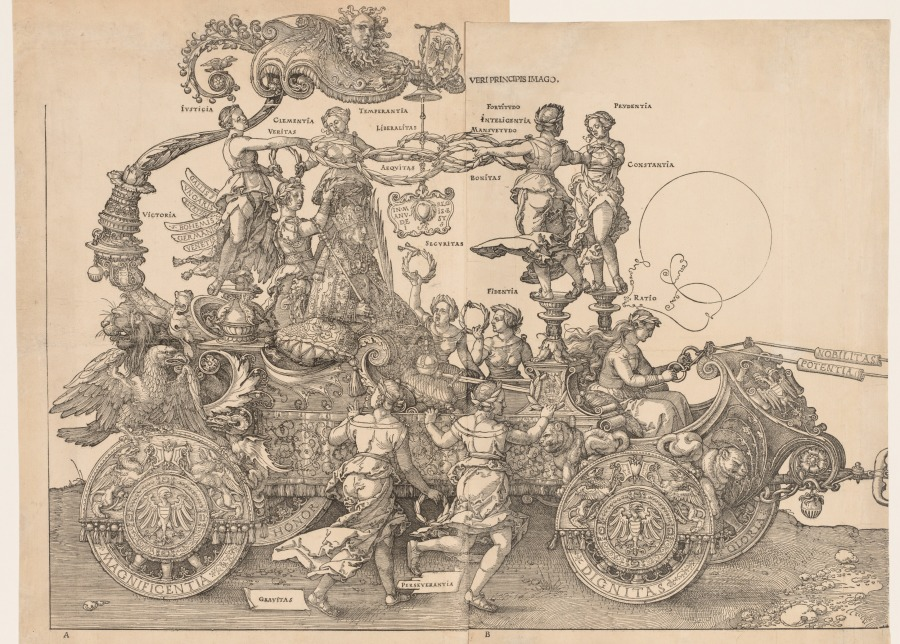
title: The Great Triumphal Car of Emperor Maximilian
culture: Germany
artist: Albrecht Dürer (German, 1471–1528)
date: 1523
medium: woodcut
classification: Print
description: Dürer conceived this fantastical chariot as part of a larger commission to depict Holy Roman Emperor Maximilian I (reigned 1486–1519) in a triumphal procession. The ruler sits enthroned in the lavish car, as Victory holds a laurel wreath above his imperial crown. Her feathered wings list Maximilian’s military campaigns. Nearly every component of the allegorical pageant—from the entourage of female attendants to the laurel garlands—has a Latin label describing honorable qualities of an ideal prince. The car rolls on wheels of Magnificence, Honor, Dignity, and Glory. Its driver is Reason, who guides a team of 12 horses with reins of Nobility and Power. Virtues of Justice, Strength, Wisdom, and Temperance, stand on pedestals arranged around the emperor. Maximilian died in 1519, before the ambitious commission could be completed. Dürer published The Great Triumphal Car at his own expense with text composed by his friend Willibald Pirckheimer (1470–1530).